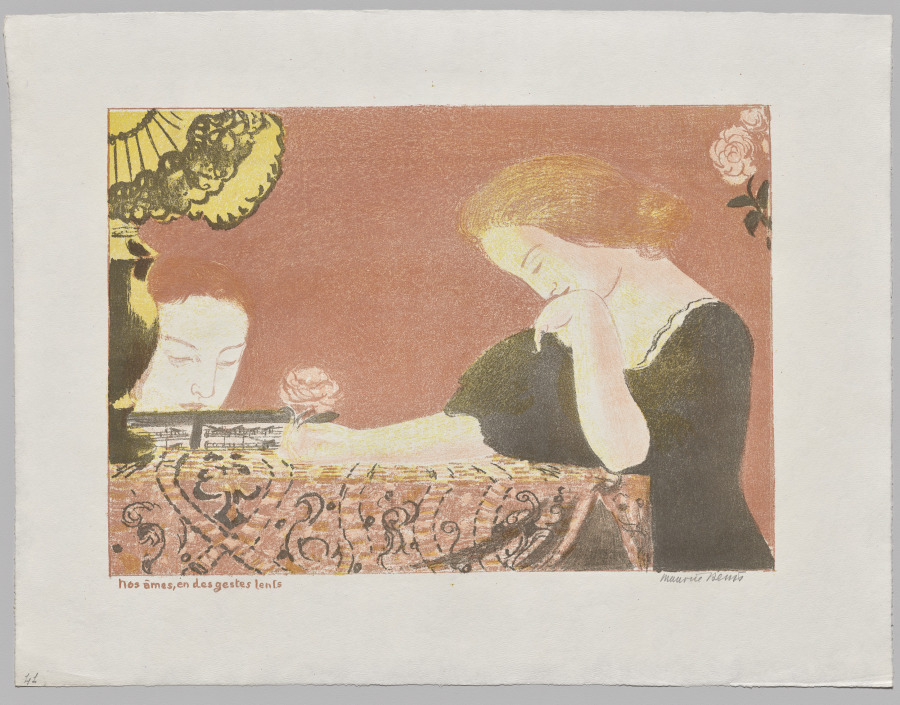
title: Our Souls, in Languorous Gestures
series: Love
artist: Maurice Denis (French, 1870–1943)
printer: August Clot (French, 1858–1936)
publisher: Ambroise Vollard (French, 1867–1939)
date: 1899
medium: color lithograph on wove paper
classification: Print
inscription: Recto, lower left: “Nos ames, en des gestes lents”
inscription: In graphite, recto, lower right: “Maurice Denis (signed)”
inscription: In graphite, recto, lower left: “41”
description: Maurice Denis belonged to the Nabis, a group of artists who came together in 1889 to pursue a radical new style informed by subjective experience and emotion. This print is from a series in which Denis explored his devotion to his wife, Marthe, by depicting her in a variety of settings alongside titles drawn from his own journal. The vague but evocative images were meant to encourage the viewer to draw connections to the theme and meditate on its meaning.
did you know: Maurice Denis was a devout Catholic and often drew visual connections between his wife, Marthe, the subject of this print series, and the Virgin Mary.